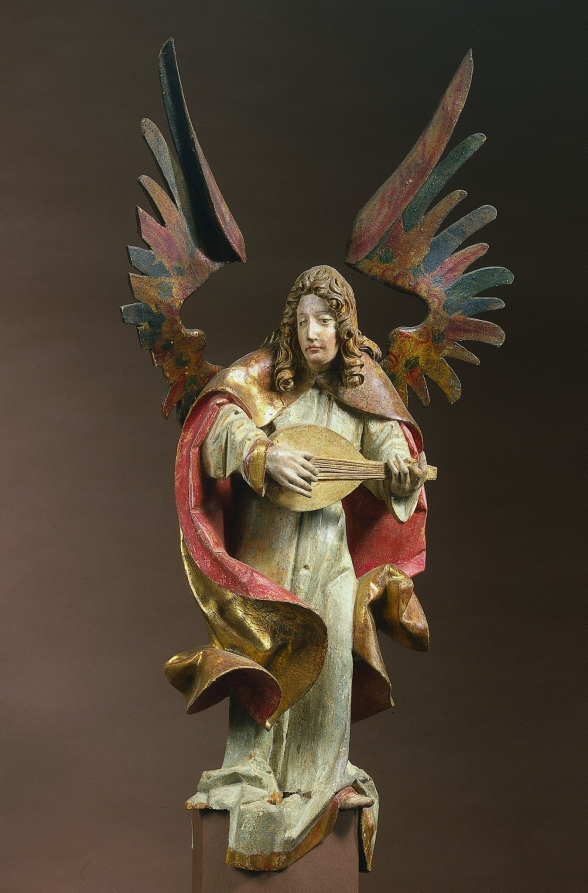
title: Lute-playing Angel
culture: Austria, Tyrol, early 16th Century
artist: Hans Schnatterpeck (Austrian)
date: made shortly after 1503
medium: Black Forest balsalm fir with polychromy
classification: Sculpture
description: This sculpture was originally placed at the top of the altarpiece of the high altar in the church at Nieder Lana, near Meran, in the South Tyrol (now part of present-day North Italy). The sculptor had contracted in 1503 to complete this altar within eight years for the payment of 1,600 gilders. Hans Schnatterpeck was originally from Landsberg am Lech in Bavaria. By 1478-79 he had settled in Meran where he operated the leading workshop in the area. This angel is a surviving element from his most famous work, the largest Gothic altarpiece of the Alpine region. Other elements survive in various public and private collections.